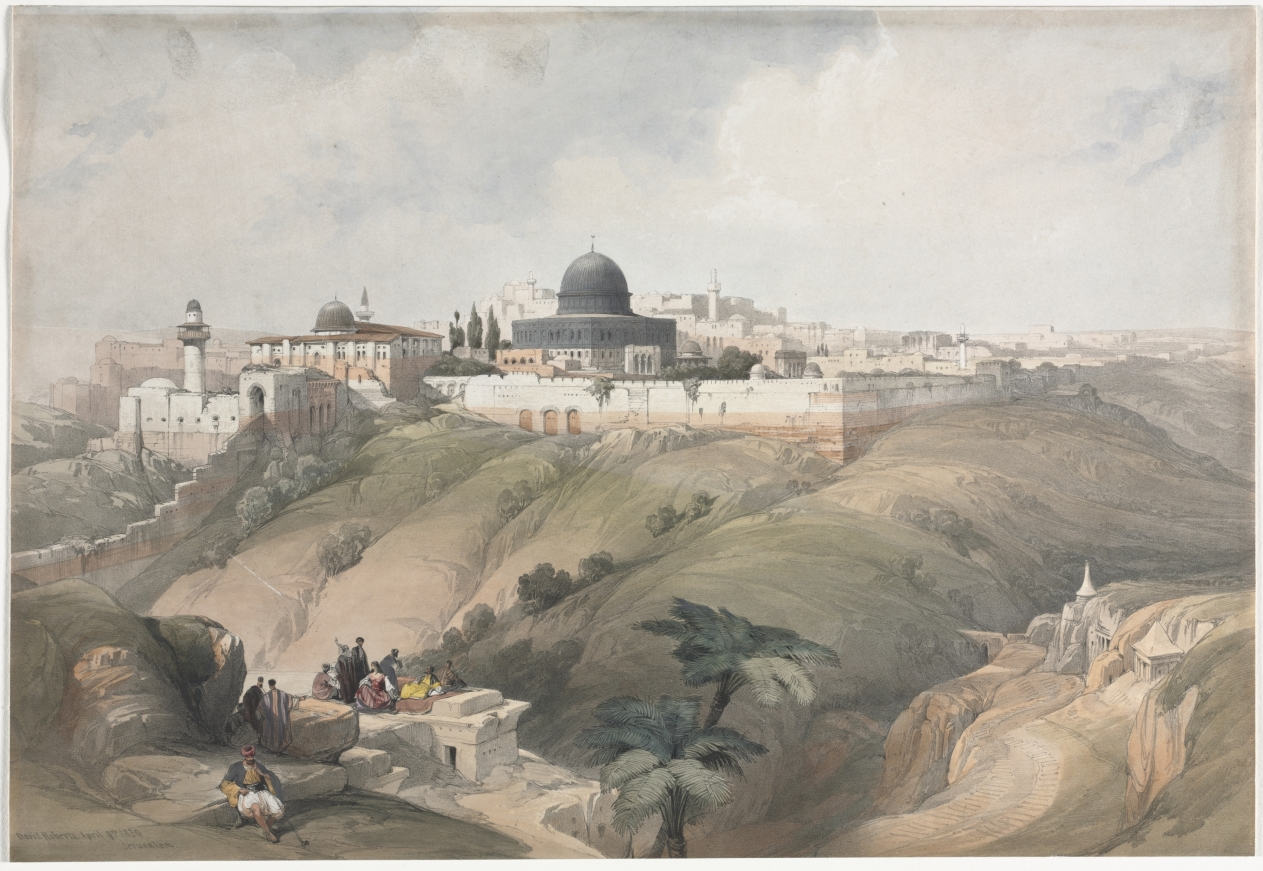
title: Jerusalem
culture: England, 19th century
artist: David Roberts (Scottish, 1796–1864)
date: 1839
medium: color lithograph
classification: Print